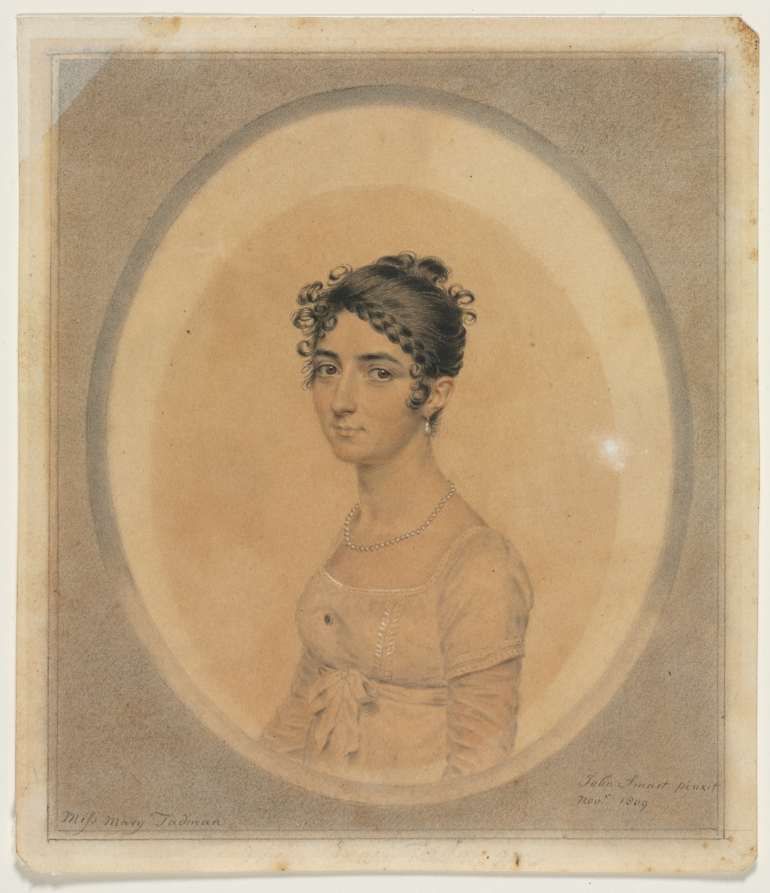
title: Portrait of Miss Mary Tadman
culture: England, 18th century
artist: John I Smart (British, 1741–1811)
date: 1809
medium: watercolor and graphite, heightened with traces of white gouache on paper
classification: Portrait Miniature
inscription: signed, lower right, in gray watercolor: John Smart pinxit / Novr. 1809 ; by artist, lower left, in gray watercolor: Miss Mary Tadman ; VERSO, upper left, in graphite: B/8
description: Mary Tadman’s head and shoulders face right. Her eyes are brown, and she wears a necklace of small pearls and a drop pearl earring. She wears her dark brown hair high in a classically inspired bun, with a braid across the hairline and many curls falling over her forehead and in front of her ears. Her white dress is delicately embroidered at the edges along the bust and is tied at the empire style waist, with a small pin fastened to the front. The translucent white sleeves worn beneath the dress are probably made of muslin and detachable, since they do not appear in the ivory version of the portrait. Detachable sleeves were popular during the late eighteenth and early nineteenth centuries and enabled a dress to function as day- and eveningwear. The nature of this work as a finished drawing rather than exclusively a preparatory sketch for a miniature on ivory is evident in the degree of finish of the sitter’s clothing, heightened with white gouache and painted to the elaborated penciled oval border. In December 1809, the year this drawing was executed, Mary Tadman (1786–1862) married Major William Jolliffe Eldridge. He died in 1818 in Poona, India, and three years later, his widow married Colonel Daniel Hutchins Bellasis (1785–1836), with whom she had two children: Flora and Augustus Fortunatus. Mary lived for nearly two decades in India, where she was a celebrated beauty, and where her second marriage into the militarily distinguished Bellasis family seems to have secured her presence in high society. On the occasion of her marriage in 1821, she wrote her spinster sister, “I forgot I have not told you a word of my marriage, which by the by was the grandest affair known in Bombay, I am almost tired of the subject—visits and congratulations, etc. The Governor and Staff went with me to Church . . . and all the people of any consequence in Bombay about 100 came to a Breakfast at Randall Lodge—since which it has been one constant scene of gaiety. Last week, pity me when I tell you, how I was obliged to exert myself—we gave a dinner party to 40 people. The Governor’s family . . . and all the Big Wigs who gave me parties—the same evening 160 came at ten to a dance—afterwards a supper very splendid I assure you.” A related ivory version of this miniature is in the Fitzwilliam Museum, Cambridge, signed and dated at the lower left: “J S / 1809.” While Miss Tadman’s coiffure, countenance, jewelry, and dress are identical to the Cleveland sketch, in this portrait she wears an elaborate black and red, flowered Indian shawl with white border over her white dress, the under-sleeves omitted. Indian shawls, particularly those from Kashmir, were extremely expensive signifiers of social status in India and Europe, and by the end of the eighteenth century, they often formed part of the trousseau of a wealthy French or English bride. The shawls were particularly fashionable worn in contrast with the high-waisted gauzy white dresses of the Empire period. While many portraits and miniatures from the early nineteenth century depict women conspicuously displaying their Indian shawls, Miss Tadman wears hers in a manner not often seen in European portraits: across one shoulder and around the waist, like a sari. Mary and William Eldridge wed in December 1809, one month after Smart signed this sketch. Because Smart depicted Miss Tadman during her engagement, the shawl worn in the finished ivory portrait may have been a gift from her betrothed, who had been stationed in Bombay in 1809. While appropriate for a half-length portrait, the under-sleeves were probably deemed unnecessary for the miniature, which shows little of the arm and instead depicts the sitter more formally, wrapped in her shawl. The existence of a larger, finished drawing as well as a miniature on ivory suggests that the finished drawing may have served a variety of roles, while also implying that another preparatory sketch for both may exist. At nearly twice the size of the ivory, Cleveland’s drawing is not likely to have been the sole preparatory exercise for the finished miniature. There is no question that as a young bride-to-be, Miss Tadman was thinking carefully about how she wished to be represented at a pivotal moment in her life, and that a single portrait was insufficient to accommodate all of the accoutrements that were of significance to her. The neo-Grec coiffure, au courant empire waist dress with detachable sleeves, pearl parure, ornamental pin, and costly shawl communicate clearly the social ambitions to which her biography is also a testament.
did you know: This drawing was passed on through the generations of the artist John Smart's family until 1937 when his great-granddaughter sold it.